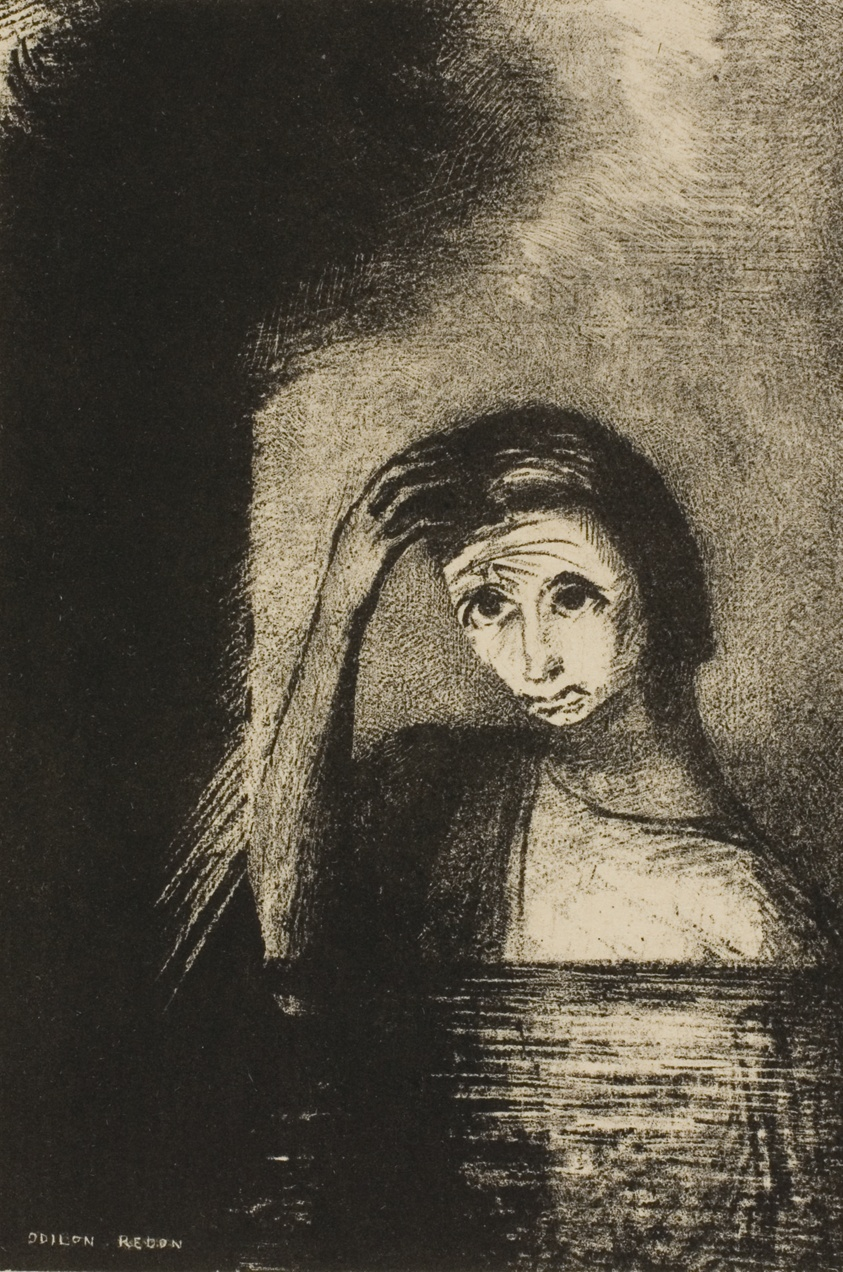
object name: Print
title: Frontispiece from Emile Verhaeren's Les Debacles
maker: Odilon Redon (French, 1840-1916)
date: 1889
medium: Lithograph in black on cream wove paper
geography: France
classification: lithograph; print; prints and drawing; paper